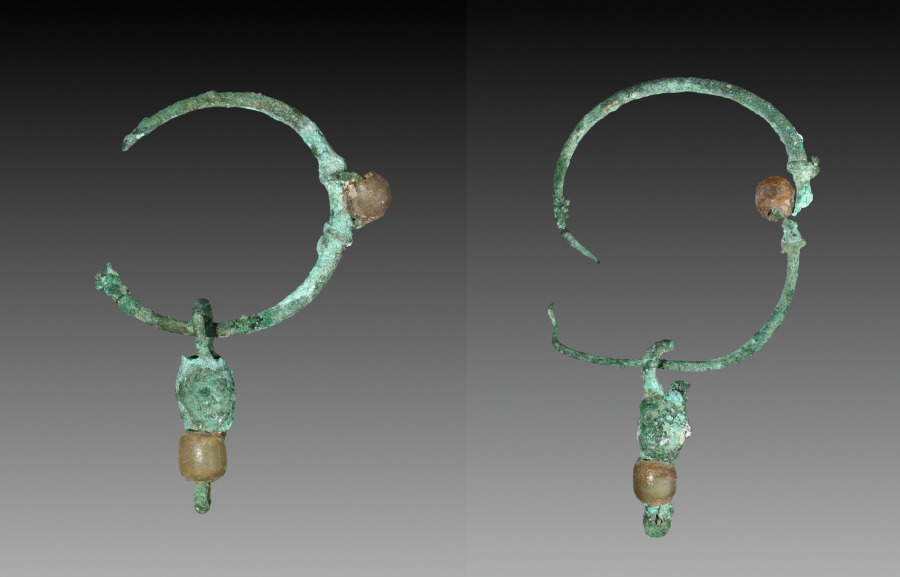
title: Pair of Earrings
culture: Egypt, Greco-Roman period (332 BCE–395 CE), Roman empire (30 BCE–395 CE)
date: 30 BCE–395 CE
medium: bronze and glass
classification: Jewelry